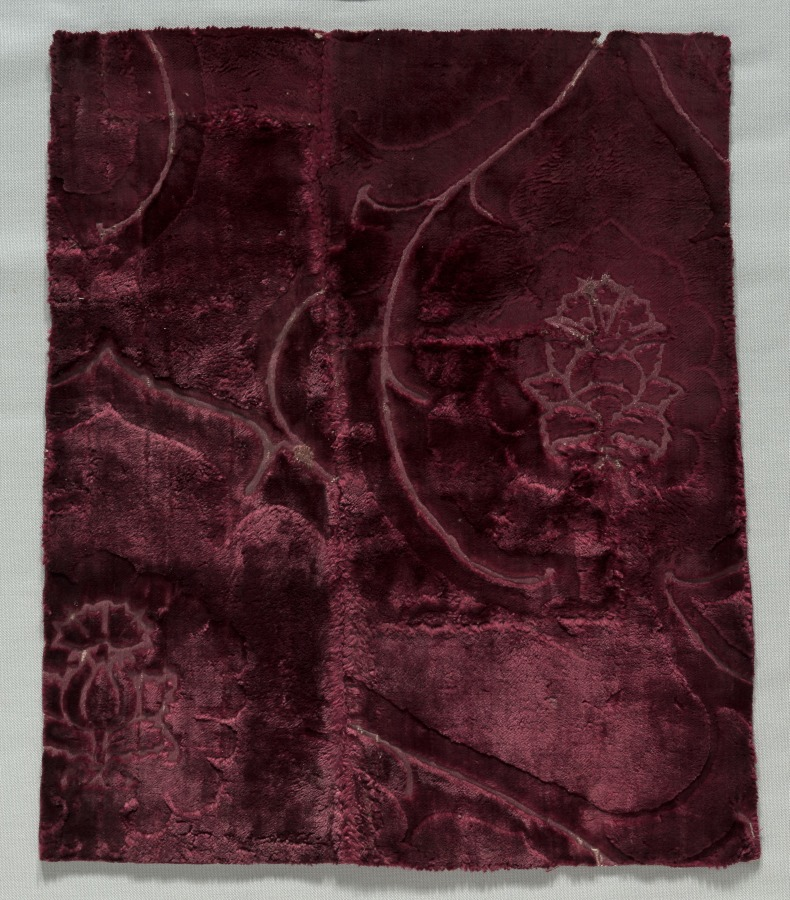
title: Two Velvet Fragments Sewn Together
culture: Italy, 15th century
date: 1400s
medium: velvet (cut and voided)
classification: Velvet